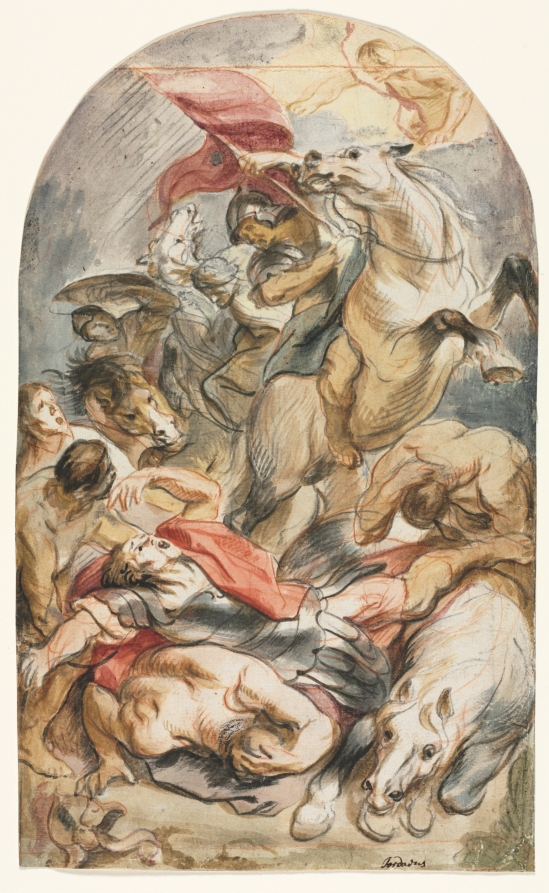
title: The Conversion of Saul with Horseman and Banner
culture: Flanders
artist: Jacob Jordaens (Flemish, 1593–1678)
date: c. 1645–47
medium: Black and red chalk, pen and black and gray ink, brush and brown wash, watercolor, and gouache, heightened with white gouache; framing lines in red chalk and graphite (right edge)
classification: Drawing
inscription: lower right, in brown ink: Jordaens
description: Jacob Jordaens was a prominent artist working in Antwerp in the 17th century. Though influenced in his use of powerful forms and vibrant color by his contemporary, Peter Paul Rubens, Jordaens was notably more realist in his tendencies. This drawing and its companion drawing in the Cleveland Museum of Art's collection (1954.367) are studies for a painting depicting the Conversion of St. Paul that Jordaens made for the the abbey church at Tongerlo, near Antwerp, in around 1647 (now lost). According to the Bible, in the year following the death of Jesus Christ, Saul of Tarsus (who became Saint Paul) was on the road to Damascus. He was suddenly surrounded by a brilliant light from above, heard the voice of Christ, and became a believer. In this work, Jordaens illustrated the climactic moment when Saul is thrown to the ground by the force of Christ's voice and blinding light. Jordaens used a combination of chalks and wet media such as ink and watercolor to create a swirling mass of bodies bathed in light.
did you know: In order to create the arch at the top of this sheet, which is almost a foot high, the artist added an additional sheet of paper.